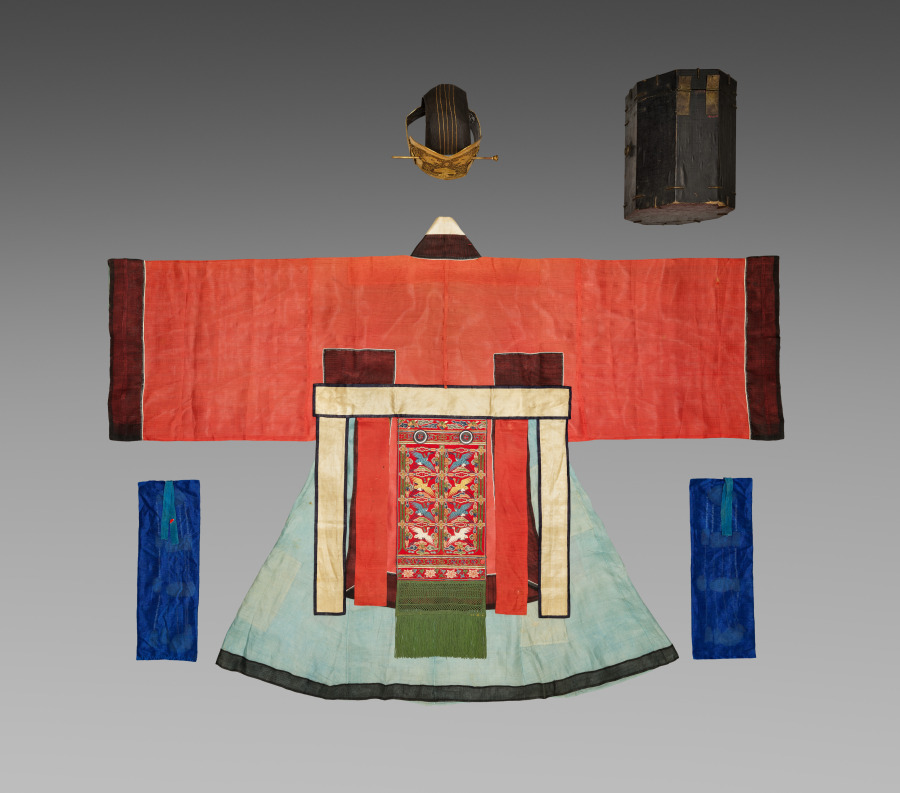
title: Royal Ceremonial Costume and Accessories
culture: Korea, Joseon dynasty (1392–1910)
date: late 1800s-early 1900s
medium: gilded paper, wire, black silk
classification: Garment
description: This is a set of royal ceremonial robe and accessories worn by a high-ranking court official for attending special state ceremonies. The set consists of an inner coat, an outer coat, a skirt, a back apron, a crown, a pair of jade tassels, a tablet, and a belt.